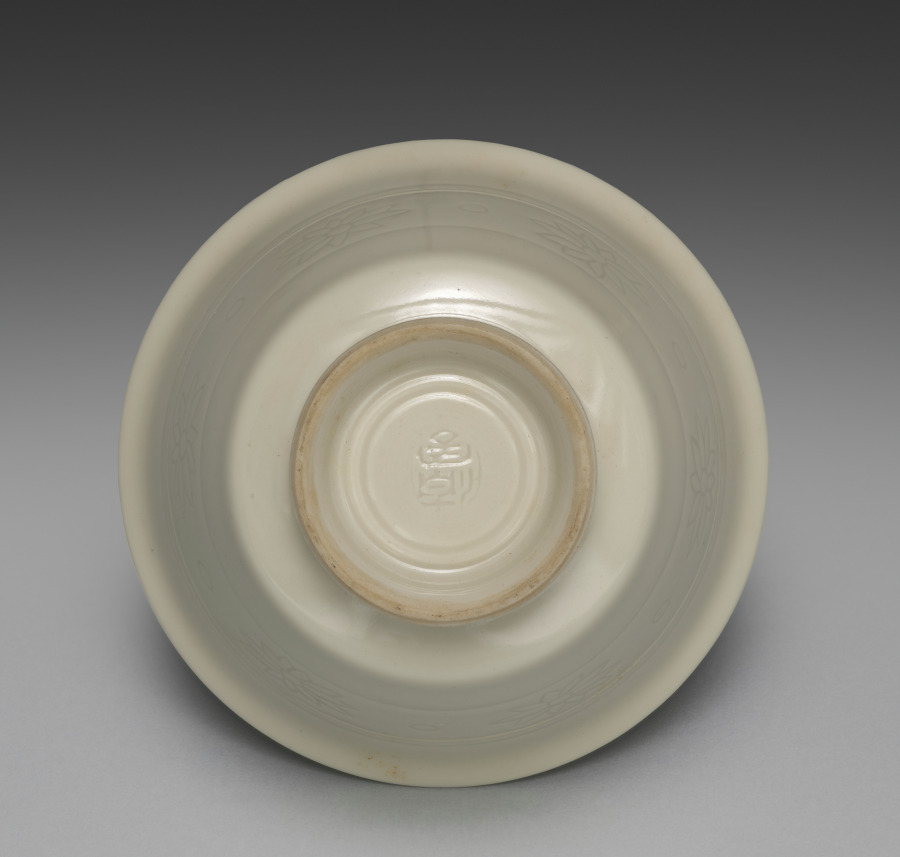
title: Teacup from Teacups with Floral Band Motif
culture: Japan, Meiji period (1868–1912)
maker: Seifū Yohei III (Japanese, 1851–1914)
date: 1893–1914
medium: One from a set of five cups; porcelain with incised decoration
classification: Ceramic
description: The five sencha teacups in this set are decorated with incised flowers and dots between a double band at the top and a single band at the bottom. They are in Yohei III’s creamy taihakuji body and glaze. In their motifs, they are quite similar to an incense burner by Yohei III (see CMA 2022.180), but the flowers are even more simple in design, with no open circle at the center. A label affixed to the side of the box refers to them as “sencha cups in emulation of Korean white [ware].” The reference to Korean ware indicates that even though Yohei was more directly inspired by Qing-dynasty wares from the Dehua kilns in Fujian Province in developing his porcelain clay and glaze for works such as these, the general understanding of the continental models still placed them, at least in terms of color, among pieces broadly associated in Japan with Korean white wares. The delicate cups are thinly potted, so they have a highly desirable translucency.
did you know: The delicate cups in this set are thinly potted, so they have a highly desirable translucency.